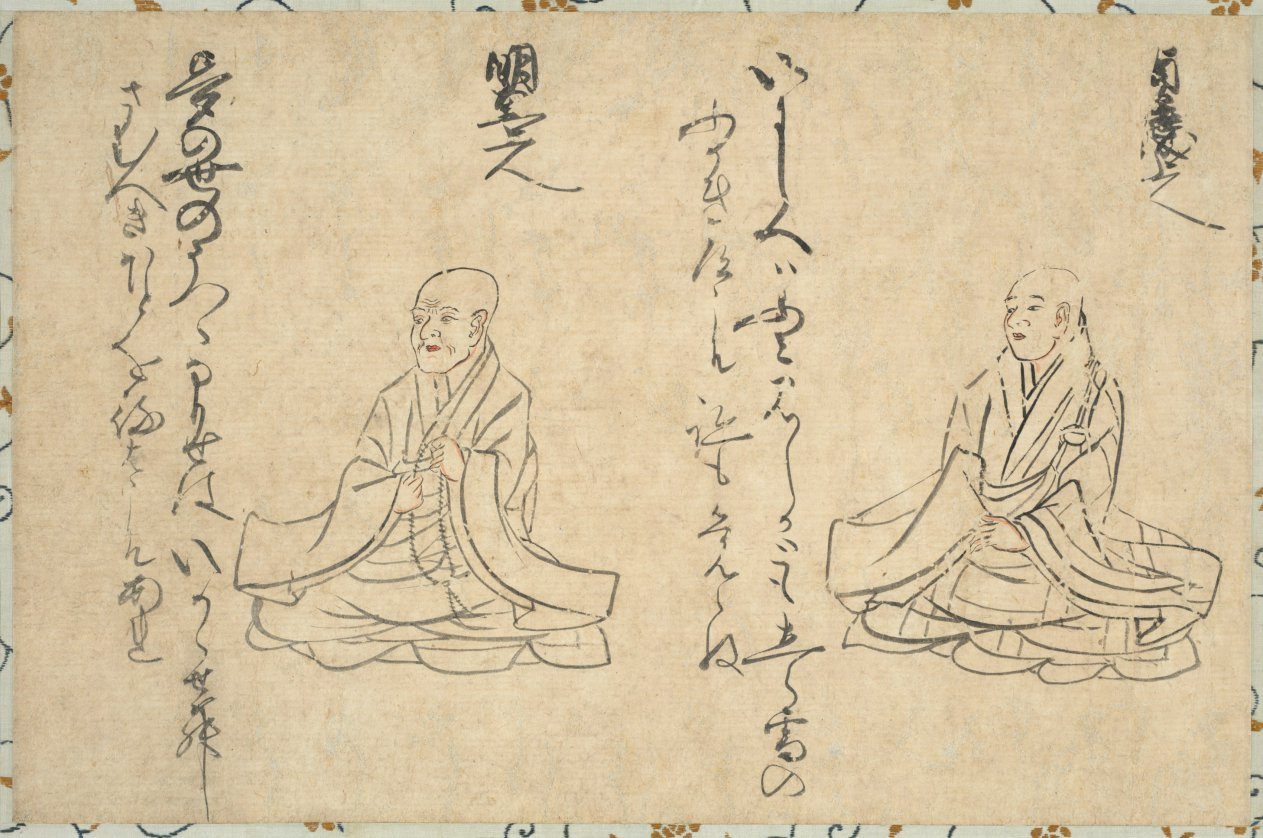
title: Thirty-Six Poetic Immortals of the Buddhist Clergy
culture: Japan, Muromachi period (1392–1573)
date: late 1300s–1400s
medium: Fragment of a handscroll remounted as a hanging scroll; ink and slight color on paper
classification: Painting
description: Handscrolls depicting eminent poets and their poems is a classic Japanese painting genre. This fragment is the end of a scroll, the beginning of which survives in the Tokyo National Museum. It has a preface stating it is based on a selection of 36 monks paired with their waka (31-syllable poems) made by Eikai (1278–1347) from Kashūji temple in the year of his death. These two portraits are of Jōkei (1155–1212) and Myōe (1173–1232), to the right and left, respectively.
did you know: The monk Myōe kept a diary of his dreams that survives in fragments today.